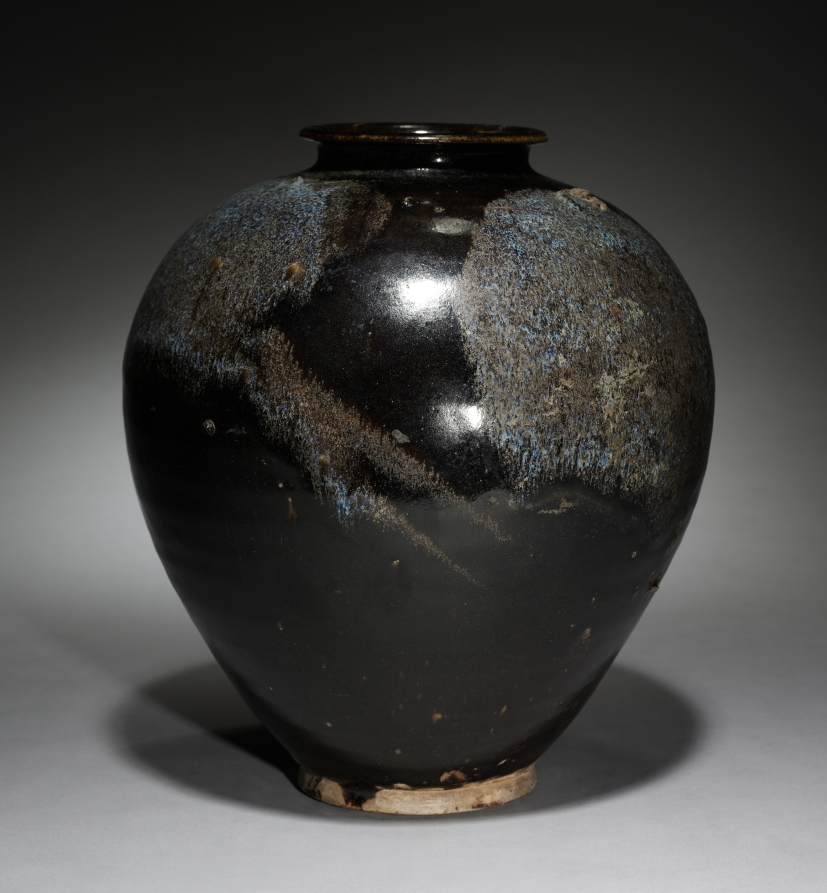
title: Jar: Black Ware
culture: China, Henan province, Huangdao kilns, Tang dynasty (618-907)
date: 700s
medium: glazed stoneware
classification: Ceramic